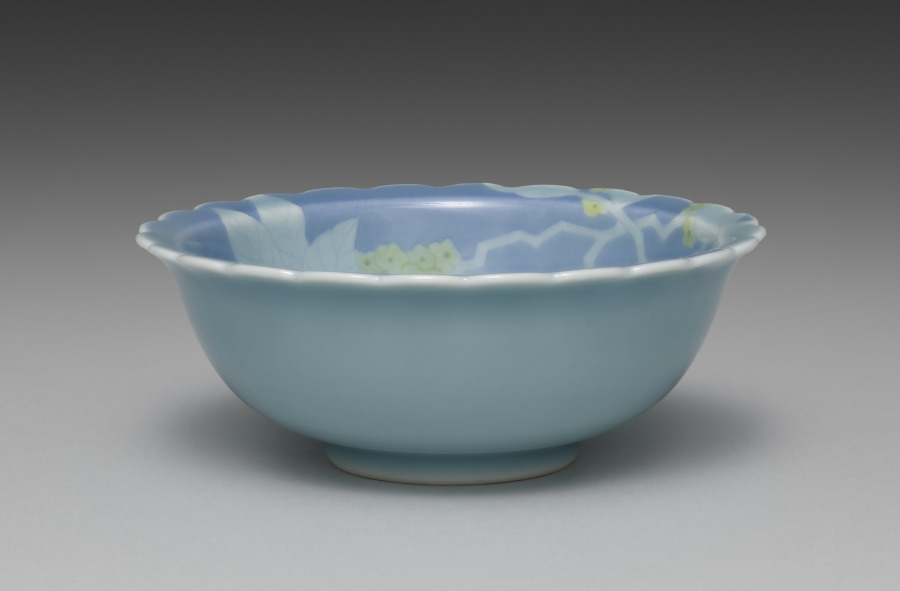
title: Dish from Dishes with Flowers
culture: Japan, Taishō period (1912–26) or Shōwa period (1926–89)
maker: Seifū Yohei IV (Japanese, 1872–1951)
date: 1914–46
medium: One from a set of five dishes; porcelain with underglaze yellow and blue glaze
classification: Ceramic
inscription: 清風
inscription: 清風造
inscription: 成山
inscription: 清風盧人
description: One can imagine a cool summer breeze when looking at this set of dishes, each shaped with a crenulated mouth and glazed with blue. Around the rim and into the basin, the bowls have low-relief designs of flowers with underglaze yellow petals; their leaves and stems show white through the glaze. On each dish, the design continues over the rim onto one side.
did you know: Seifū Yohei IV’s dishes with flowers feature underglaze yellow.